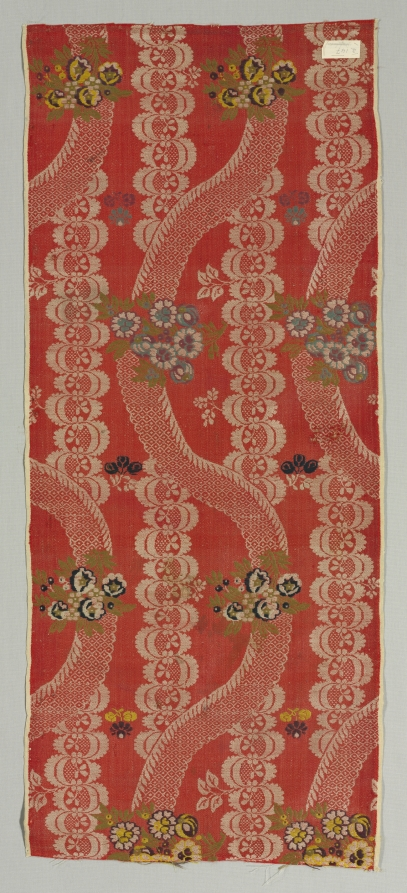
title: Fragment of Textile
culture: Spain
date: 1700s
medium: fancy satin, brocaded: wool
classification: Textile